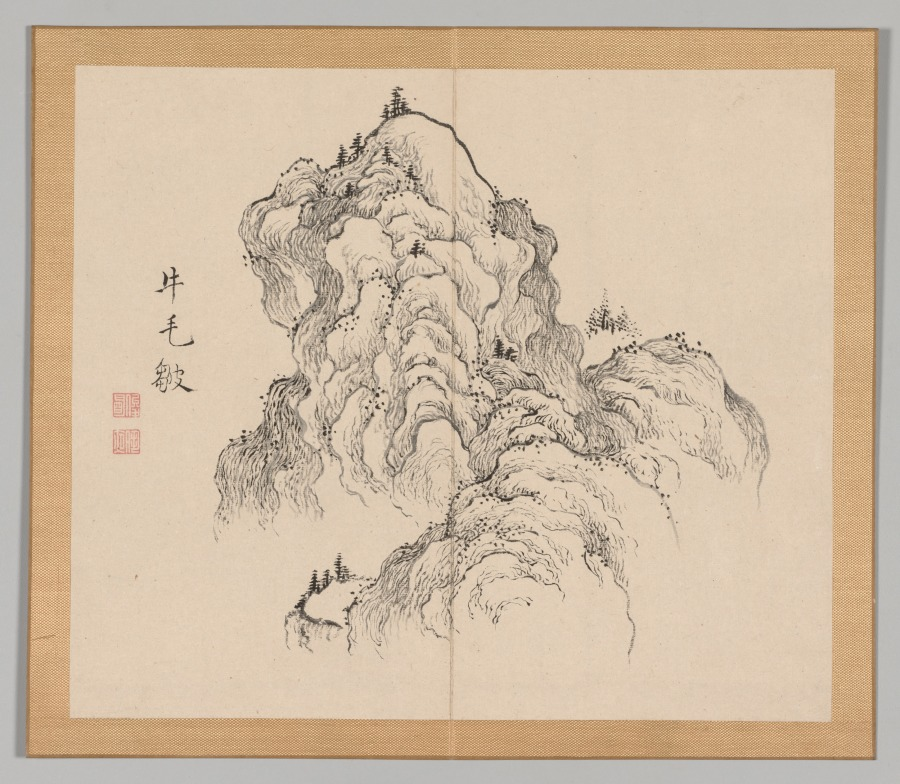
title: Reverberations of Taiga, Volume 1 (leaf 16)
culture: Japan, Edo period (1615–1868)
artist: Aoki Shukuya (Japanese, d. 1802)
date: mid- to late 1700s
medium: double-leaf from a pair of albums; ink and light color on paper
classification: Portfolio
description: Traditionally, young painters in Japan began their studies with an established master-painter. The master's compositions invariably became models that the apprentice copied to learn various ink and brush techniques. Shukuya was a pupil of the famous Kyoto artist Ikeno Taiga, whose style is reflected in these sketches of rocks, trees, and mountains.